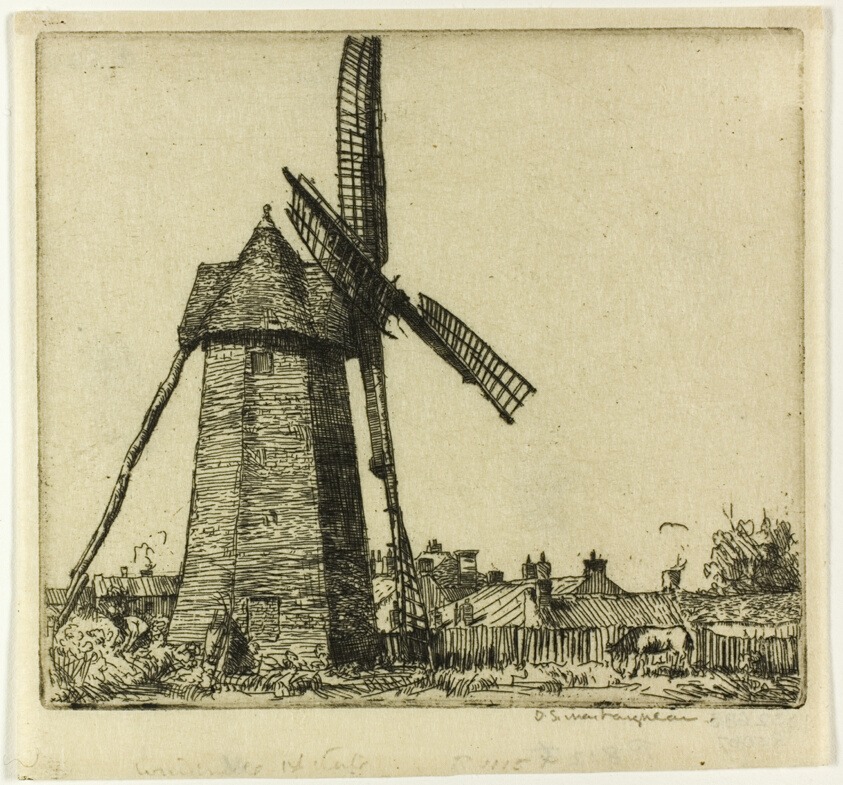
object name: Print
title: The Windmill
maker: Donald Shaw MacLaughlan (American, born Canada, 1876-1938)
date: 1902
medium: Etching in black on cream wove paper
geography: United States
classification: etching; print; prints and drawing